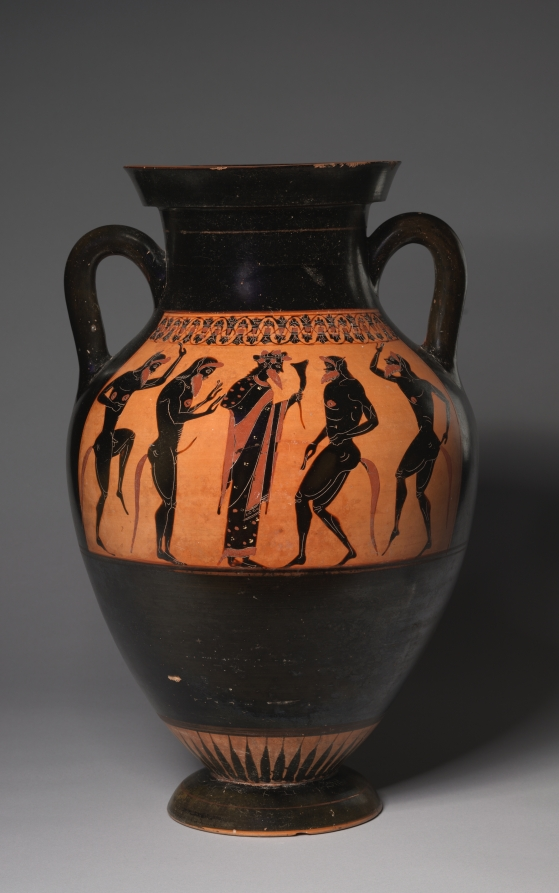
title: Black-Figure Amphora (Type B; Storage Vessel): Battling Warriors (A); Dionysos and Satyrs (B)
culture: Greek, Attic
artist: attributed to The Bateman Group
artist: manner of Lysippides Painter (Greek, Attic, active c. 530–515 BCE)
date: c. 530–520 BCE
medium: ceramic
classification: Ceramic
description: Formerly owned by John Bateman, Esq., this amphora provided a name for the Bateman Group, five amphorae likely decorated by a single painter. On either side, a reserved panel holds a carefully composed scene: four striding soldiers above a fallen warrior; and four dancing satyrs around the wine god Dionysos. Similar scenes appear on other Bateman Group vases, as well as in the much larger body of work attributed to the more well-known Lysippides Painter.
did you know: This vase was already old-fashioned when first made; its shape was preferred by earlier generations of vase painters.